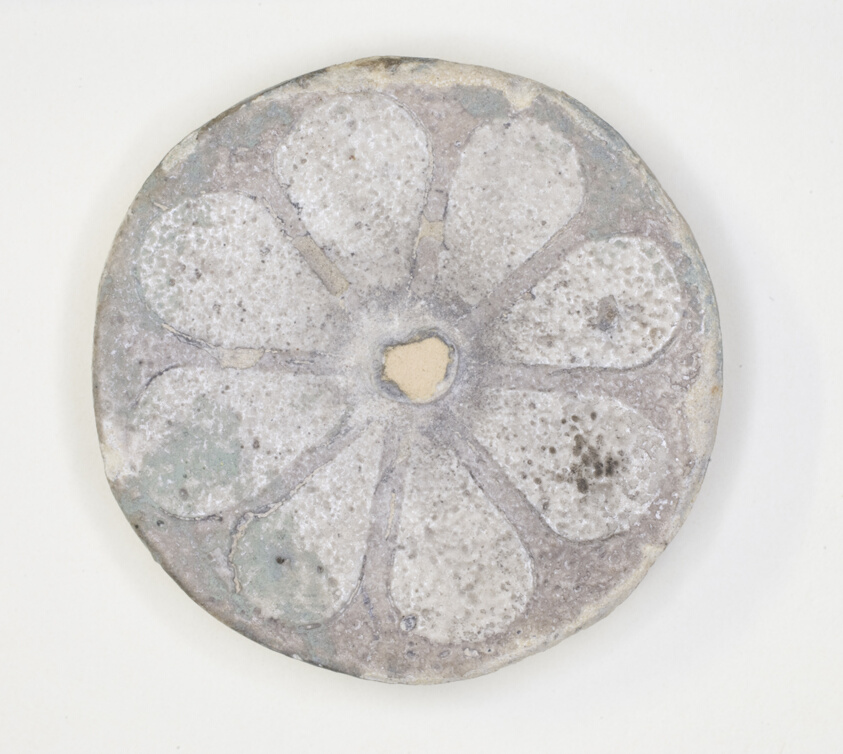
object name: Decorative Arts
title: Rosette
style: new kingdom, egyptian, ancient, ramesside period, twentieth dynasty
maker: Egyptian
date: New Kingdom, Dynasty 20 (about 1186–1069 BCE)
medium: Faience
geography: Egypt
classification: inlay; ceramics; ancient art; decorative arts; faïence (composite material)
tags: flowers